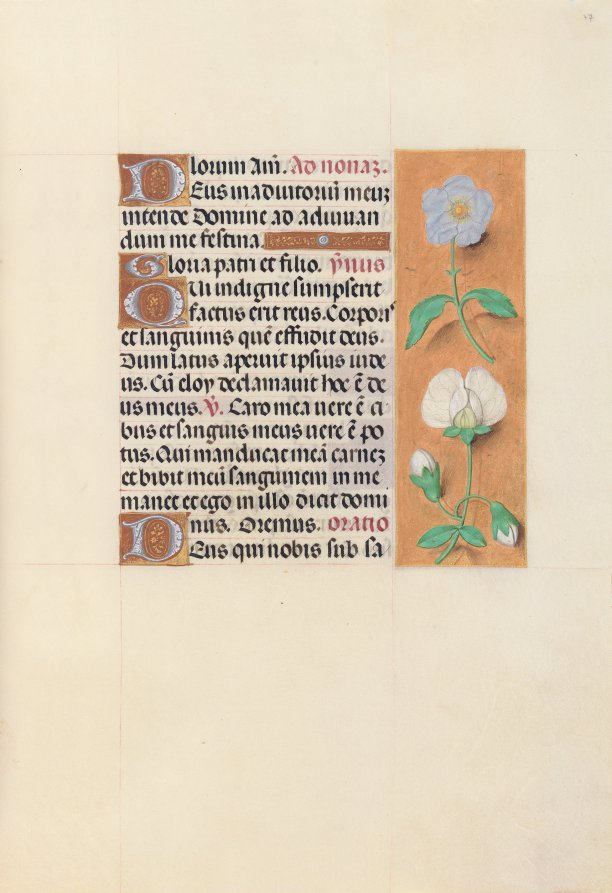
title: Hours of Queen Isabella the Catholic, Queen of Spain: Fol. 47r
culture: Flanders, Ghent and Bruges, late 15th century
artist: Master of the First Prayerbook of Maximillian (Flemish, c. 1444–1519)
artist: and Associates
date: c. 1500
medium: ink, tempera, and gold on vellum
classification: Bound Volume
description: This manuscript was illuminated by a circle of at least five highly organized manuscript painters active in the Flemish cities of Ghent and Bruges. The principal illuminator was Alexander Bening, who painted the majority of the book's miniatures. Manuscripts produced by this circle of artists are renowned for the decoration of their borders, which typically feature a rich variety of realistically-painted flowers, birds, and butterflies. This prayer book, called a book of hours, was intended not for a cleric, but for the private devotions of a lay person-in this case, Isabella the Catholic, Queen of Spain (1451-1504). Isabella's coat of arms embellishes the book's frontispiece. It is unlikely that the book was commissioned by the Queen herself; rather, she probably received it as a diplomatic gift from someone courting her patronage, perhaps Cardinal Francisco Jimenez de Cisneros. A Franciscan friar, Jimenez was dependent upon Isabella for his advancement, first to the post of Queen's confessor in 1492, and then to Archbishop of Toledo in 1495.